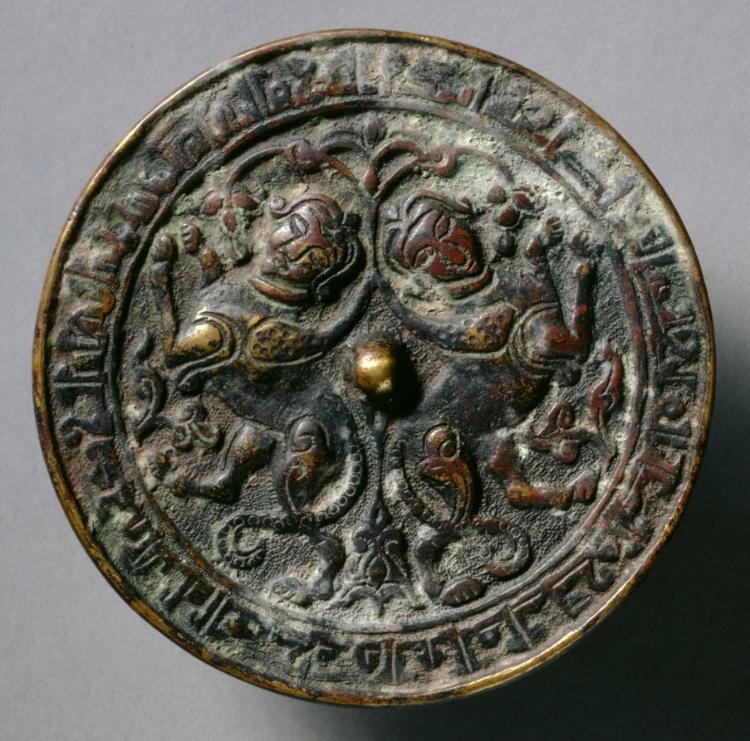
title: Mirror with Addorsed Sphinxes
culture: Eastern Anatolia or Northern Mesopotamia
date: 1200s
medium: Cast bronze with relief decoration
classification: Metalwork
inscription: Arabic inscription in degenerate floriated angular script around rim. Inscription is poorly written, but is identical to that on mirrors in Kuwait al-Sabah Collection (LNS102M) and Musée des Arts Decoratifs (14918). Translation (from M. Jenkins, "The al-Sabah Collection," 1983, p. 69): Glory and continence and good fortune and splendor and high position and praise and happiness and nobility and power and increase and potency and blessings to its owner forever.